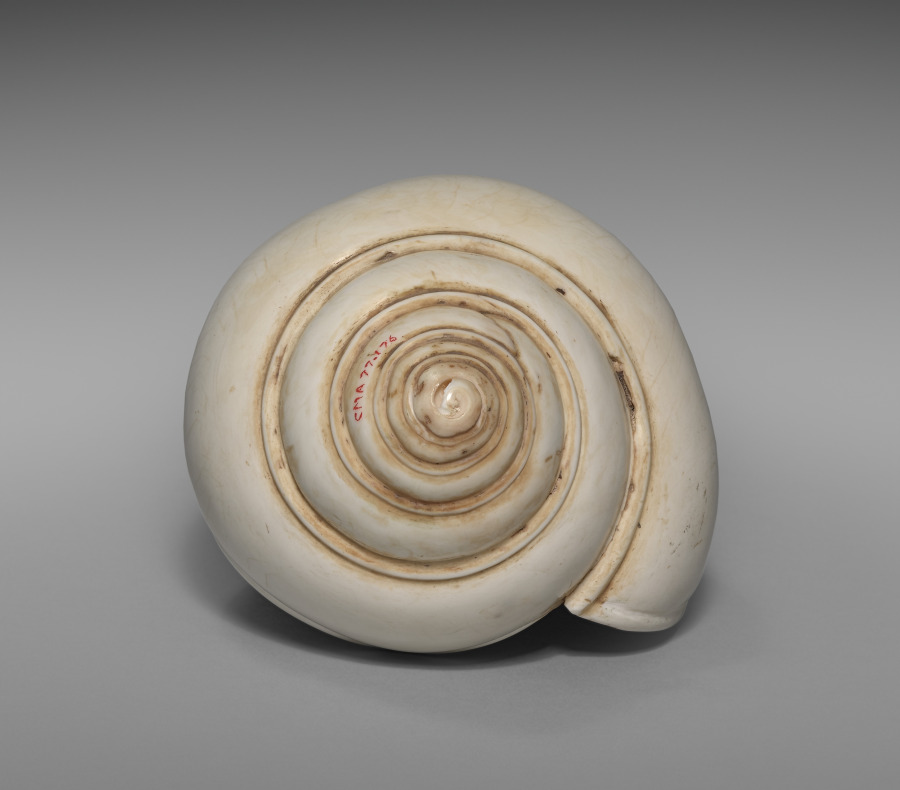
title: Ritual conch shell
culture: Cambodia, Khmer, Angkor Period, 12th-13th Century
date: 1100s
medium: shell and bronze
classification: Sculpture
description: A royal temple like Banteay Chhmar was built for performing rituals and to honor images of gods, Buddhas, and other sacred or enlightened beings for the sake of the kingdom’s protection and ongoing prosperity. Conch shells were blown at the start of rituals to make the sound corresponding to the syllable om. The dancing figure of Hevajra, a Buddhist being of enlightenment with eight heads, sixteen arms, and four legs, has been worked into the bronze embellishment of the shell. Hevajra was elevated to a prominent position in Khmer Buddhism of the Angkorian period as the standard figure denoting the practice of rituals prescribed in a text called the Hevajra-tantra. The tripod stand with three serpents is probably not original to the shell.